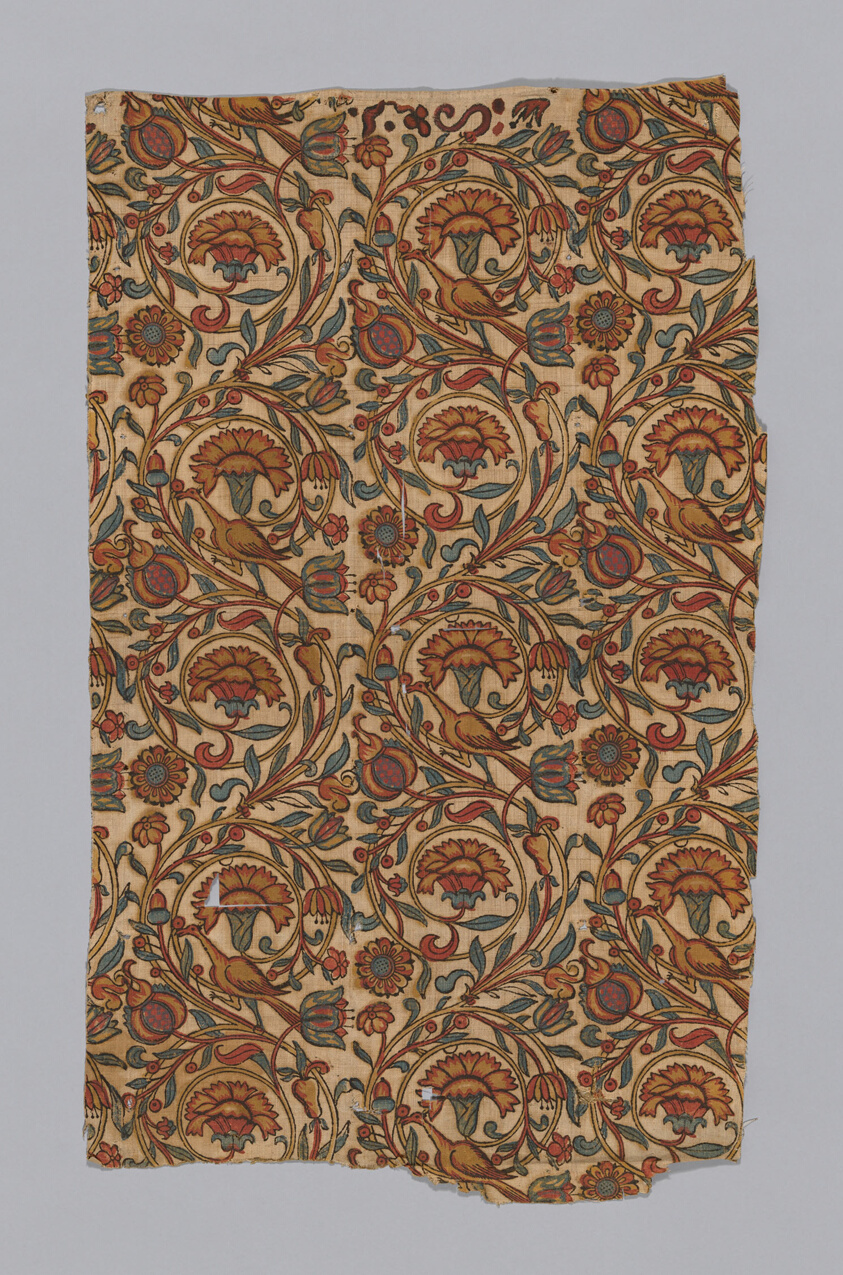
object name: Textile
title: Fragment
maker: Netherlands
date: 19th century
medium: Cotton, plain weave; printed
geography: Netherlands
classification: textile; weaving; weaving - printed